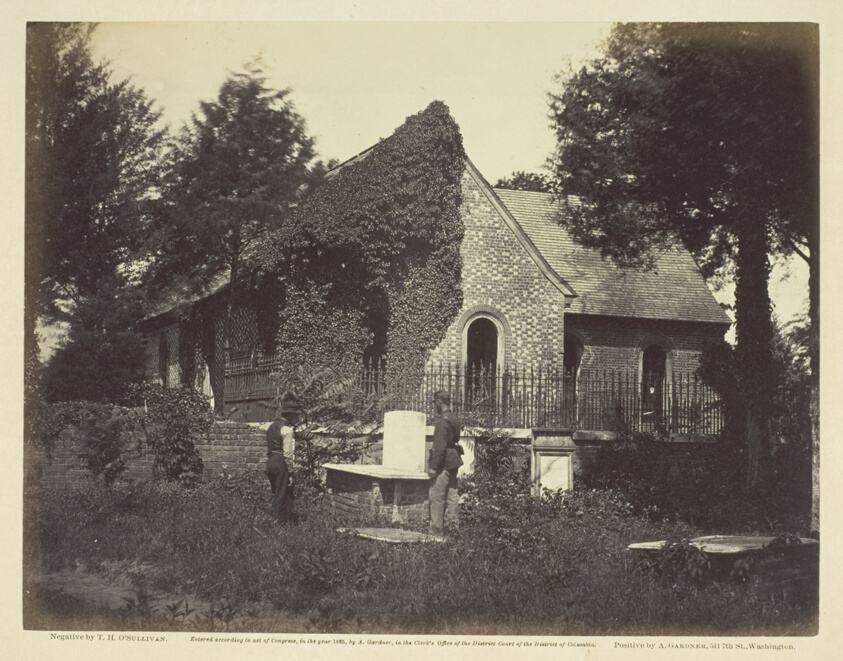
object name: Photograph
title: Blandford Church, Petersburg, Virginia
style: 19th century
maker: Timothy O'Sullivan (American, born Ireland, 1840–1882)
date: April 1865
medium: Albumen print, pl. 85 from the album "Gardner's Photographic Sketch Book of the War, Volume II" (1866)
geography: United States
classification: photograph; albumen silver print; photography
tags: Collected by Hugh Edwards, Gardner's Photographic Sketch Book